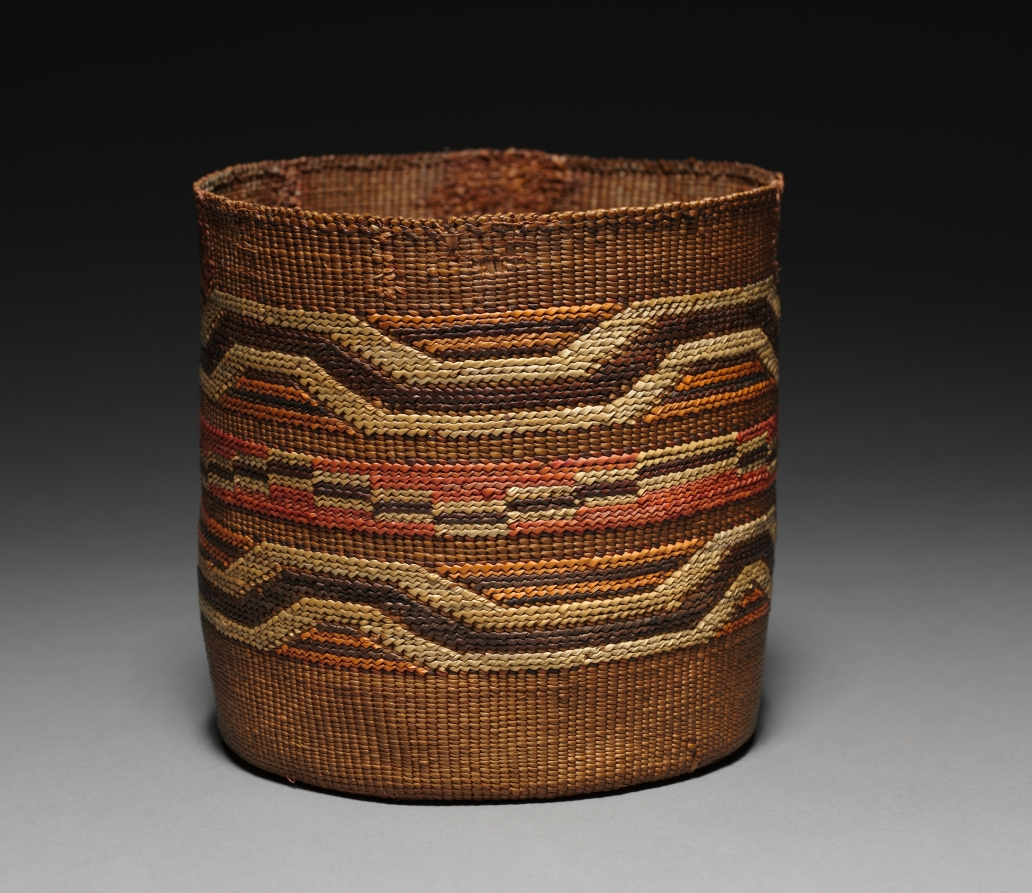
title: Bowl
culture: Northwest Coast, Tlingit, Unassigned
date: Unassigned, before 1917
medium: twined, imbricated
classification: Basketry